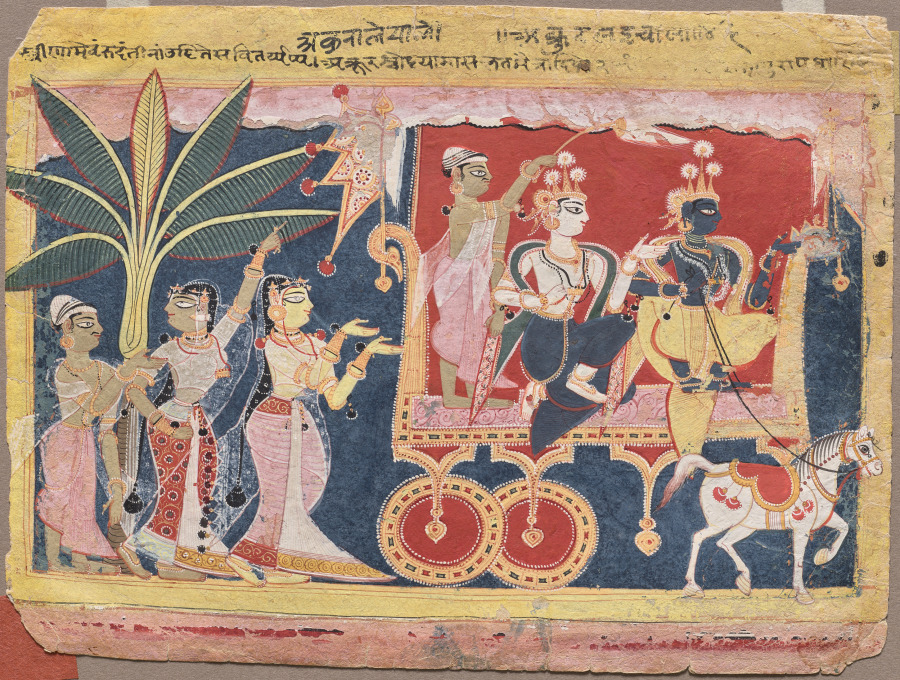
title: Akrura Drives Krishna and Balarama to Mathura, from the “Isarda Bhagavata Purana”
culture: Northwestern India, Rajasthan, Isarda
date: c. 1560–70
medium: Gum tempera and ink on paper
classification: Painting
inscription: [[verso, crossed out, in center]] 42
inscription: [[recto, upper right corner]] 42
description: A page from a Hindu manuscript shows the dark-skinned Krishna and his white-skinned brother leaving their companions in the cowherd village where they grew up. They are on their way to confront their evil uncle who killed their siblings and imprisoned their parents. Their gestures urgently indicate the direction of their journey. A preference for the color pink in the sky, chariot, and garments distinguishes this work from those of pre-Mughal creation.